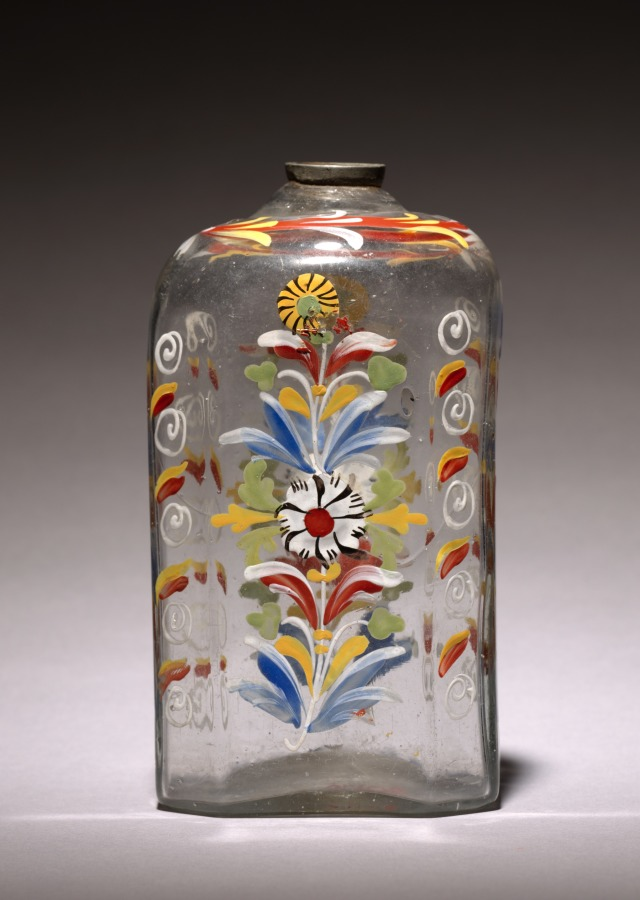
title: Enameled Bottle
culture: America, Stiegel Type, 18th century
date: 1700s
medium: glass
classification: Glass